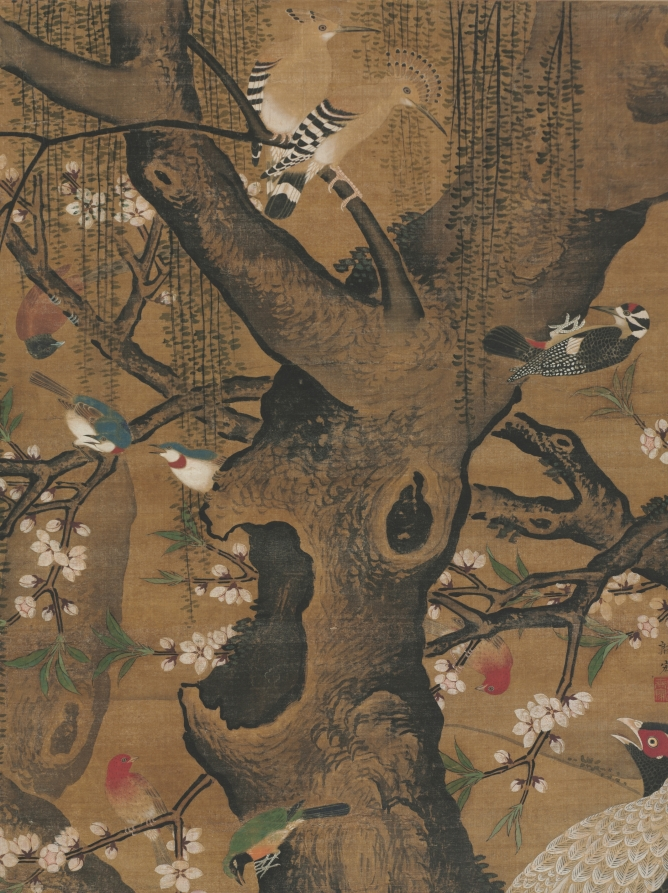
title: Birds Gather under the Spring Willow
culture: China, Ming dynasty (1368–1644)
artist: Yin Hong (Chinese, c. 1430-c. 1500)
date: late 1400s-early 1500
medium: hanging scroll, ink and color on silk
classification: Painting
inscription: 殷宏. [印]金臺世家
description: This scroll depicts a spring scene with all kinds of birds, including one peacock with a hen among peonies. The painting is one of four surviving works by Yin Hong bearing his signature and seals. Some scholars debate whether this work depicts the theme “One Hundred Birds admiring the Phoenix,” a metaphor for human society presenting an idealized hierarchy under imperial rule; other scholars argue that peafowls, as exotic birds not native to China, would not be depicted to represent the emperor. This large painting might have been hung in a palace hall and may have been part of a set depicting the four seasons.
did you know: The peahen is plucking a dandelion.